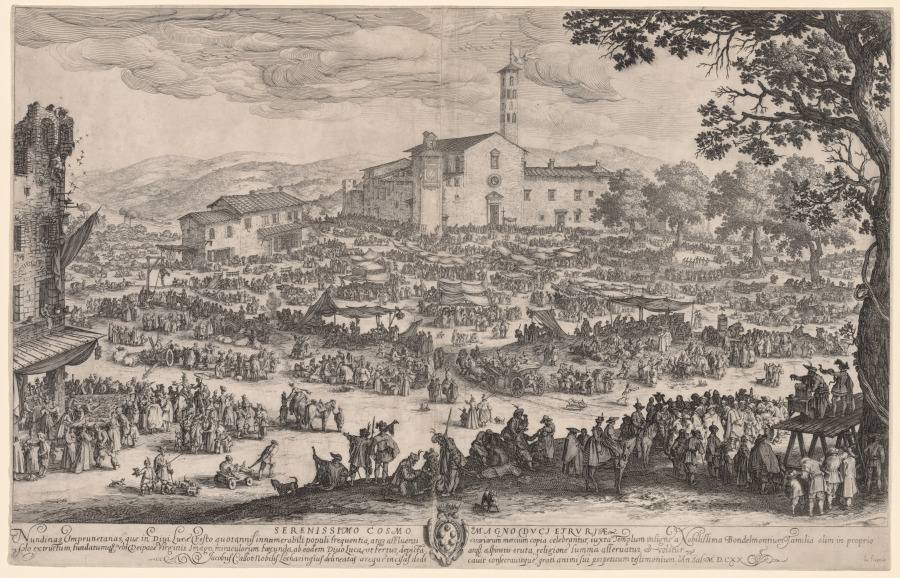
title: The Fair at Impruneta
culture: France, 17th century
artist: Jacques Callot (French, 1592–1635)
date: 1620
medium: etching on two sheets of paper joined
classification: Print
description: The annual fair held in Impruneta, a commune in Florence, Italy, was an opportunity for rural and urban communities to comingle and partake in commerce, socializing, and festivity. Jacques Callot filled the panorama with 1,138 people, 45 horses, 67 donkeys, and 137 dogs. Prominent in the left foreground is a vendor of tableware patronized by a mix of social classes, selling footed tazzas (shallow cups mounted on stems) and goblets. Pick-pocketing, fighting, snake-charming, and the punishment of a criminal by torture also occur. Callot dedicated this print to the Grand Duke of Tuscany, for whom the fair signified a healthy Florentine economy.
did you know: Callot's innovative formulas and techniques for etching included a process of stepped acid baths to achieve greater tonal variation from foreground to background.